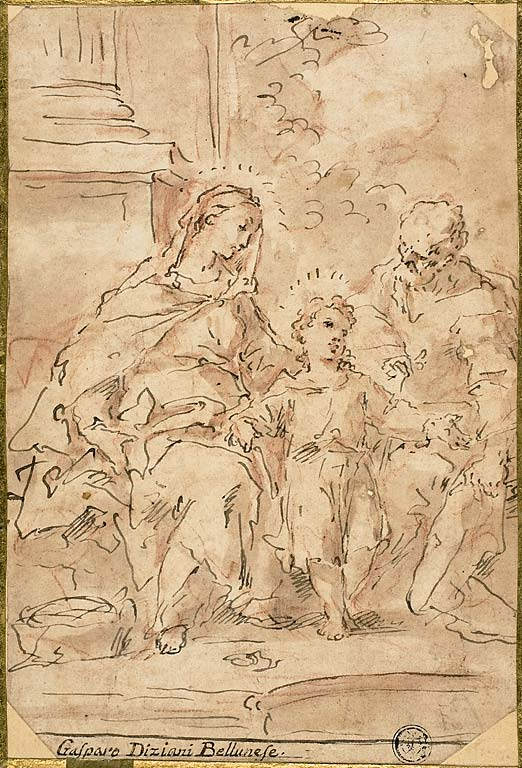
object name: Drawing and Watercolor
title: Holy Family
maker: Gaspare Diziani (Italian, 1689-1767)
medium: Pen and brown ink, with brush and brown wash, over red chalk, on ivory laid paper, laid down on cream laid card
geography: Italy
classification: pen and ink drawings; drawings (visual works); prints and drawing